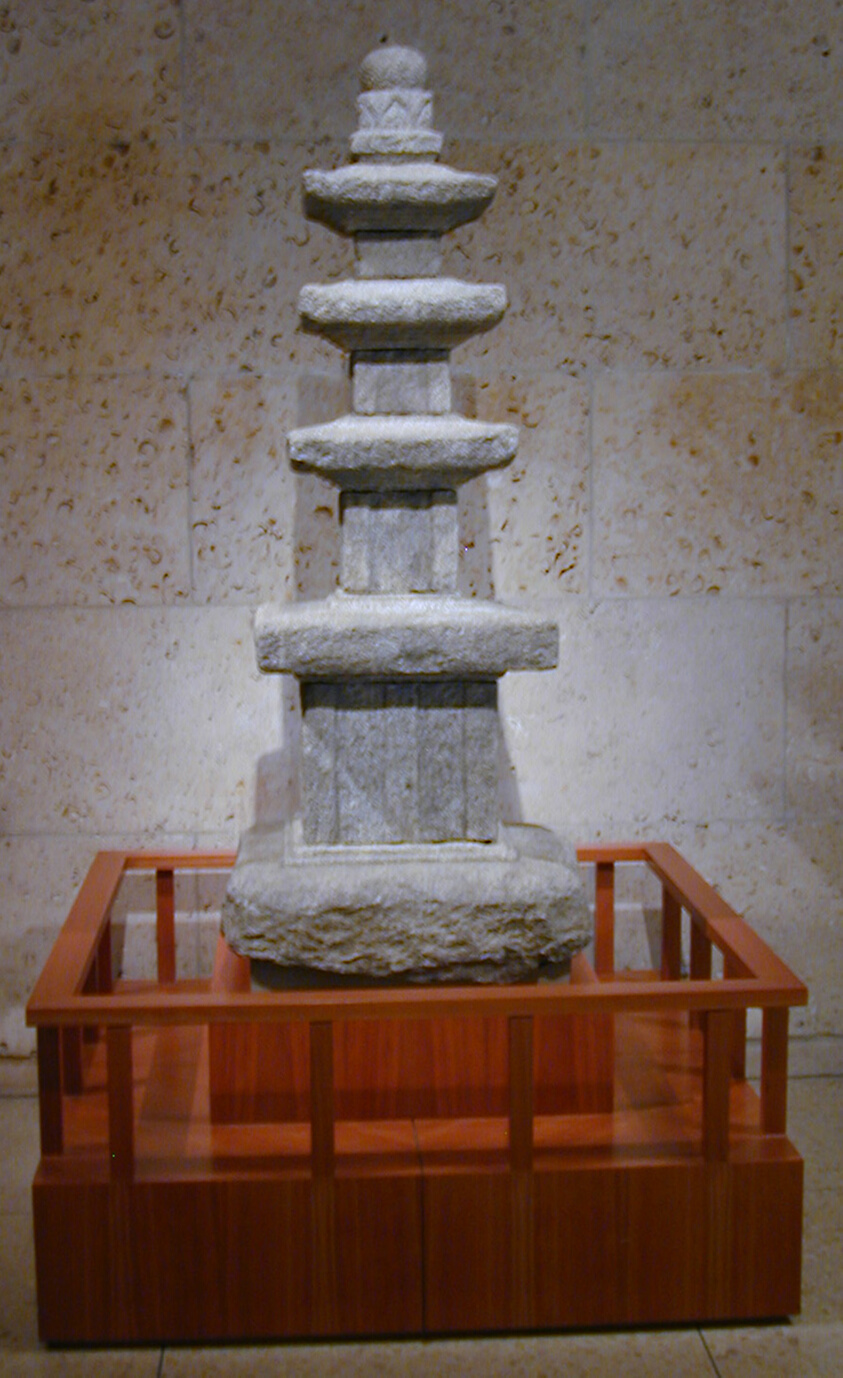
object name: Sculpture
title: Buddhist Pagoda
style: Korean (culture or style)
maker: Korea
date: late Goryeo dynasty(918–1392)–early Joseon dynasty(1392–1910), 14th/16th century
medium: Granite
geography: Korea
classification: stone; sculpture; asian art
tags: architecture